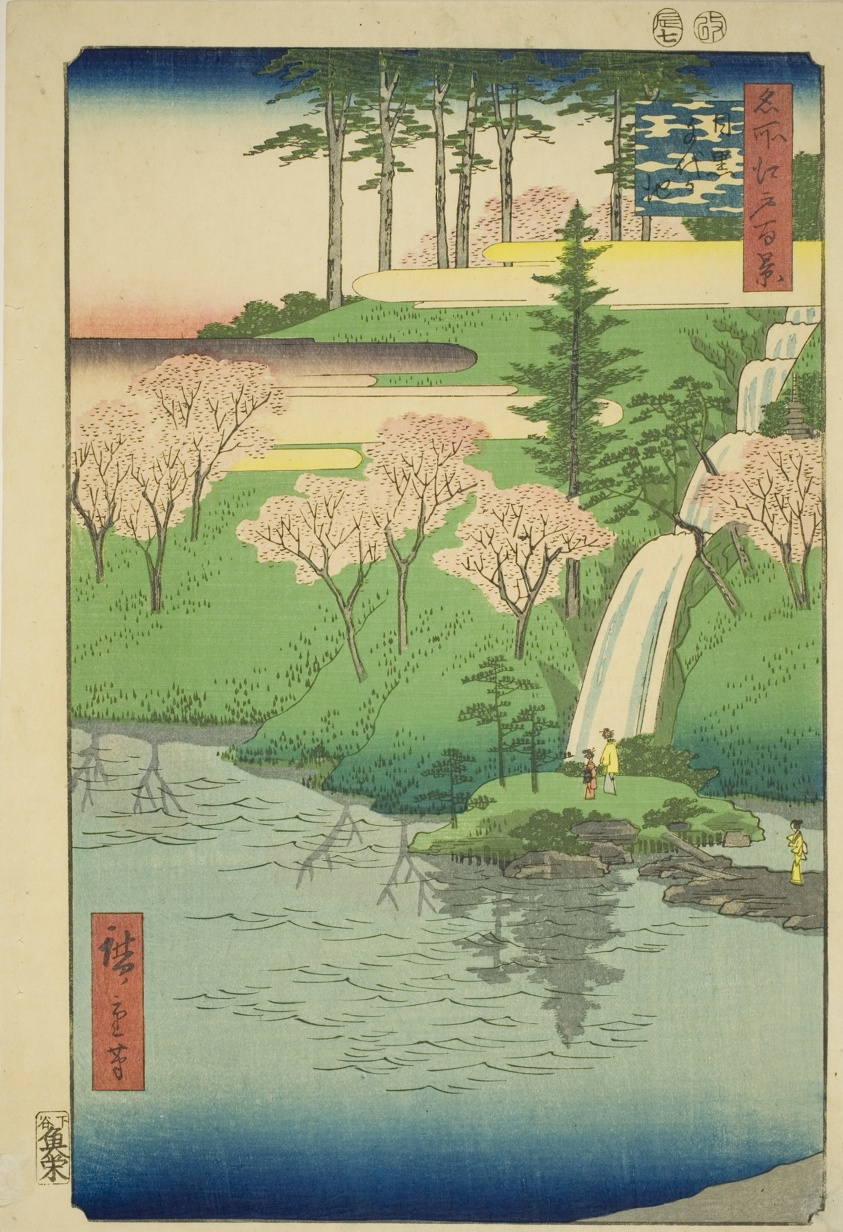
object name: Print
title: Chiyogaike Pond, Meguro (Meguro Chiyogaike), from the series "One Hundred Famous Views of Edo (Meisho Edo hyakkei)"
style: Japanese (culture or style)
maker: Utagawa Hiroshige 歌川 広重; Japanese, 1797-1858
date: 1856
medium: Color woodblock print; oban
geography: Japan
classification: woodblock print; print; asian art